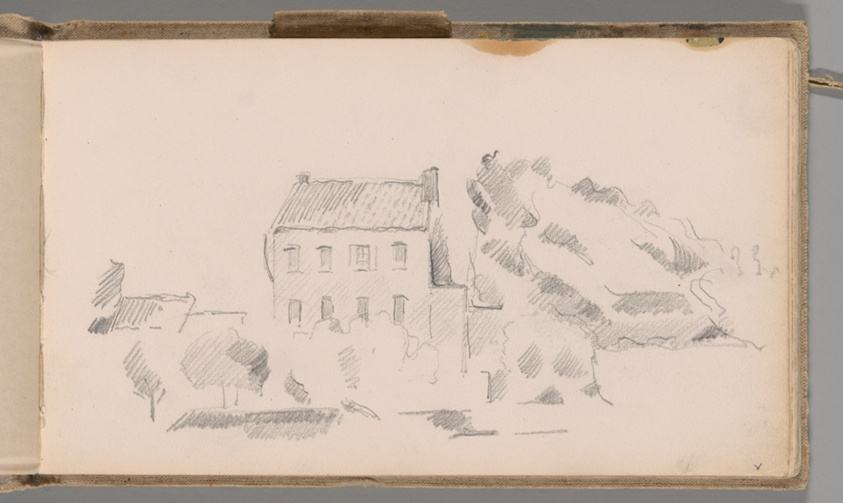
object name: Drawing and Watercolor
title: Sketchbook No. 2 (L'Estaque)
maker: Paul Cézanne; French, 1839-1906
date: 1875–86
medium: Graphite and pen and ink drawings on paper, bound into a book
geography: France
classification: sketchbook; graphite; prints and drawing; paper